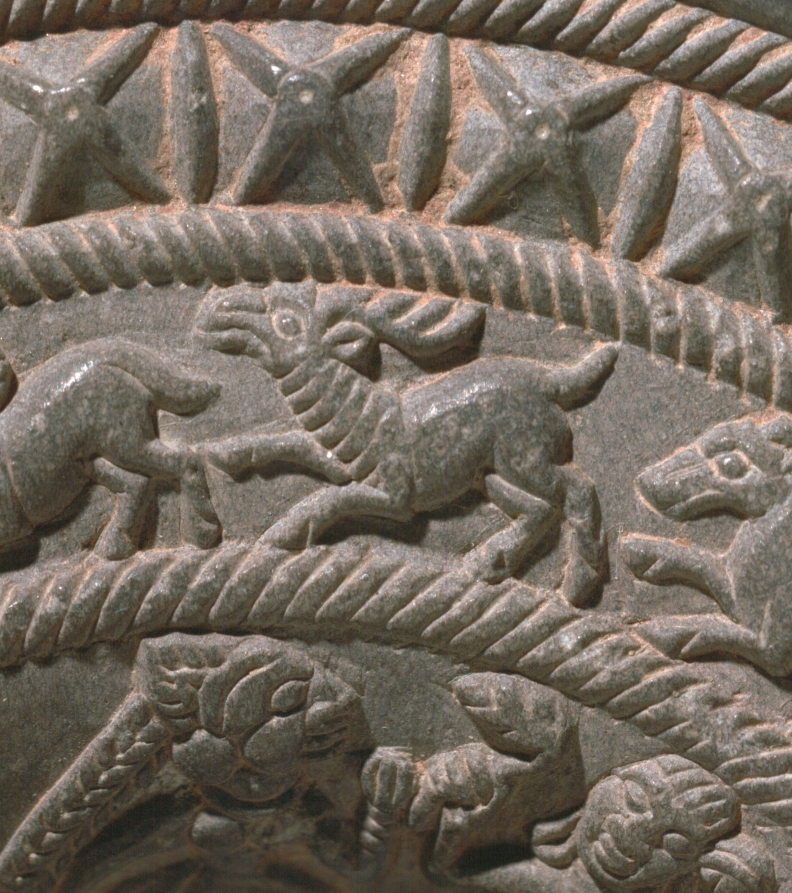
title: Ringstone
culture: India, Maurya period (322–185 BCE)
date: 200s BCE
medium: steatite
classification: Sculpture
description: Ringstones are among the earliest works of art to be created in stone during India's historical period. This example is finely carved with detailed images of affectionate couples and palm trees, running animals, and geometric motifs in concentric circles. The function of ringstones remains uncertain, since none of the surviving examples is inscribed or explained in a text.